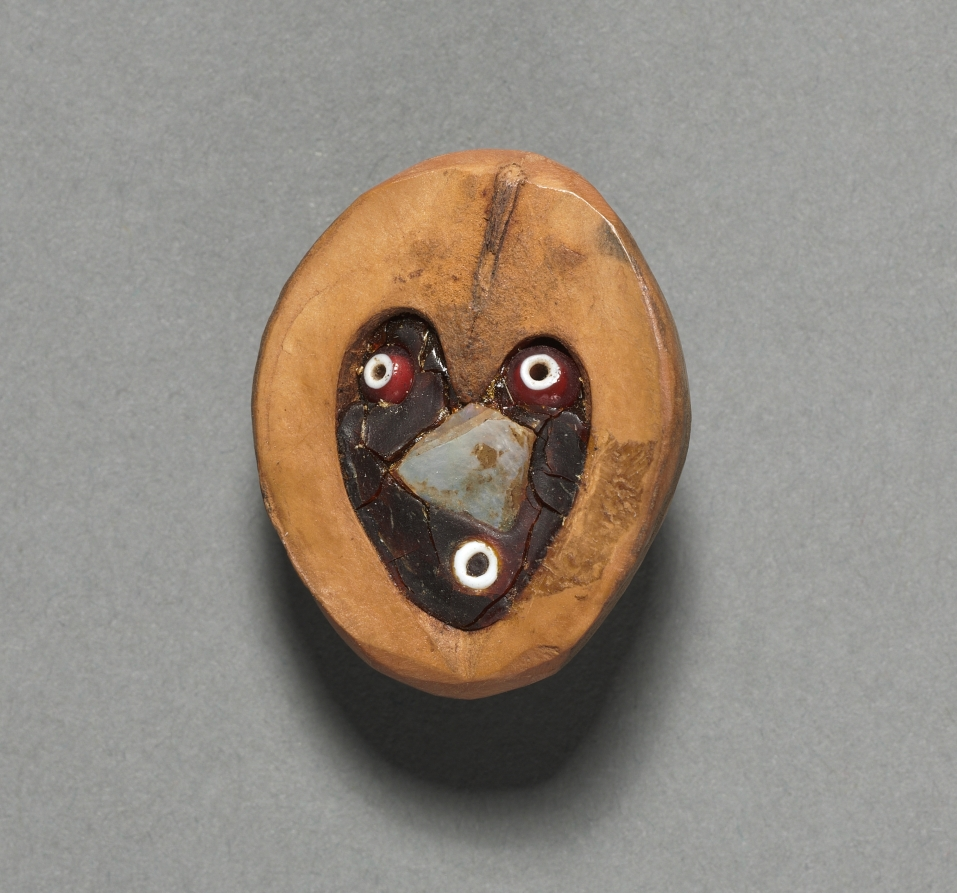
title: Gambling Dice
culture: California, Tulare, Unassigned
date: before 1917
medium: hollow shell, resin, glass beads, mica/seashell fragment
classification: Implements